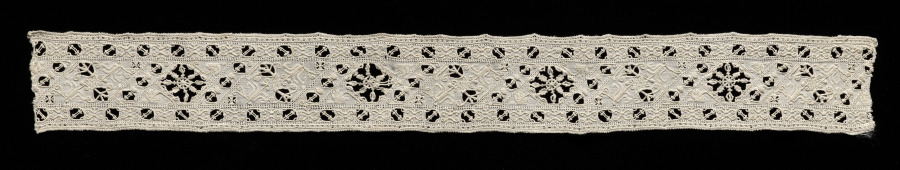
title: Lace Band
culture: Italy, 1560-1699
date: 1560–1699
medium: Linen: needle lace (cutwork) insertion and embroidery (curl stitch and satin stitch)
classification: Lace